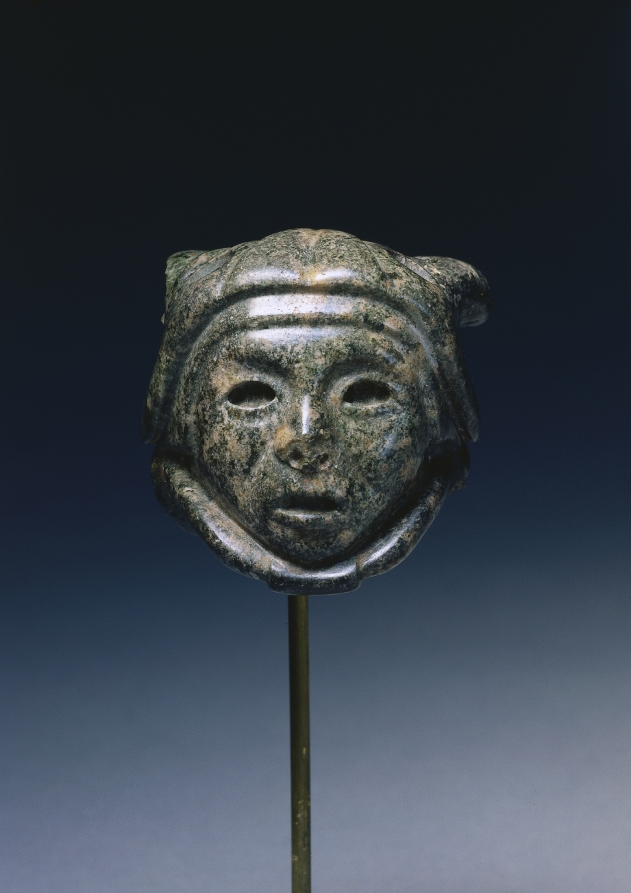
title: Head in Mouth of Snake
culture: Central Mexico, Aztec, Post-Classic Period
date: 1325–1519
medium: greenstone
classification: Stone